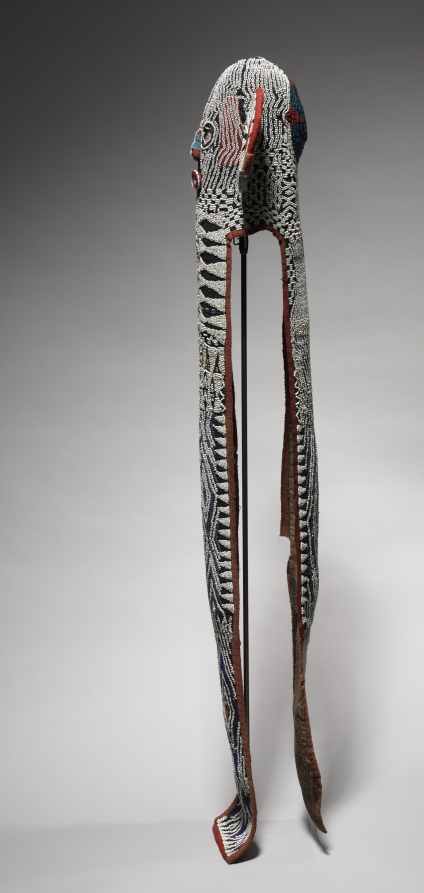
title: Mask (mbap mteng): Elephant (aka)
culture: Africa, Central Africa, Cameroon, Grassfields region, Bamileke-style maker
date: early 1900s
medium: Cotton, burlap, glass beads, twine, leather, and wood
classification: Mask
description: The name given to masks like this, mbap mteng, means "animal with huge ears." In the Cameroon Grassfields kingdoms, the elephant signifies power, authority, prestige, and leadership. The colorful glass beads that decorate the mask’s surface were imported from Venice and Bohemia (in Europe) and signal wealth and prosperity. Its geometric patterns include triangles that evoke the leopard, another animal linked with royal power. Members of Kuosi, an elite male society, wore such elephant masks for ritual dances and funerary ceremonies. This mask would have been worn with a costume that included a feather headdress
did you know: Performers wore elephant masks with indigo-dyed robes, red feather headdresses, and leopard pelts. Leopards and elephants symbolized royal power.